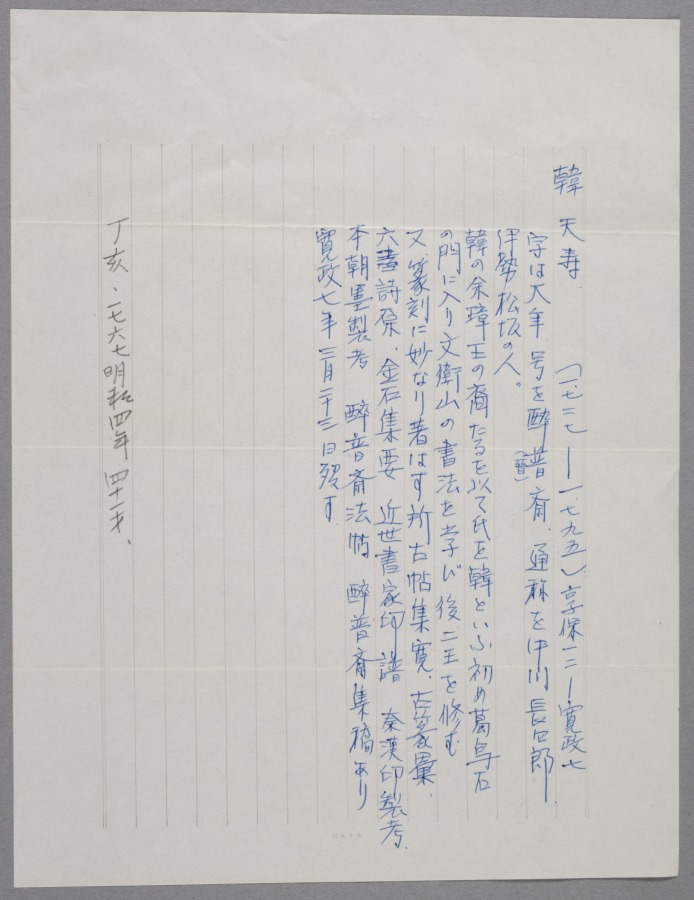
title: Landscape with Gentle Peaks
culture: Japan, Edo period (1615–1868)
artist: Kan Tenju (Japanese, 1727–1795)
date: 1767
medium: hanging scroll; ink and light color on paper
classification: Painting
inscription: 雨過嵐光煙／雲陽樹影諫／夕陽独在左／？卷讀残書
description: A figure sits in a retreat tucked into the mountains near a waterfall. The painter, Kan Tenju, was best known as a calligrapher and seal carver. Of Korean heritage, he was a patron of artist Ike Taiga (池大雅) (1723–1776), and a cousin of Taiga’s student Aoki Shukuya (青木 夙夜) (died 1802). His Chinese-style poem reads as follows: Smoky mist in the mountain reflects light after the rain, Sunlight passes through the clouds to cast shadows of the trees, Alone in the sunset, I read a well-worn book.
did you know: This painting combines image and calligraphy, connected by skillful brushwork.